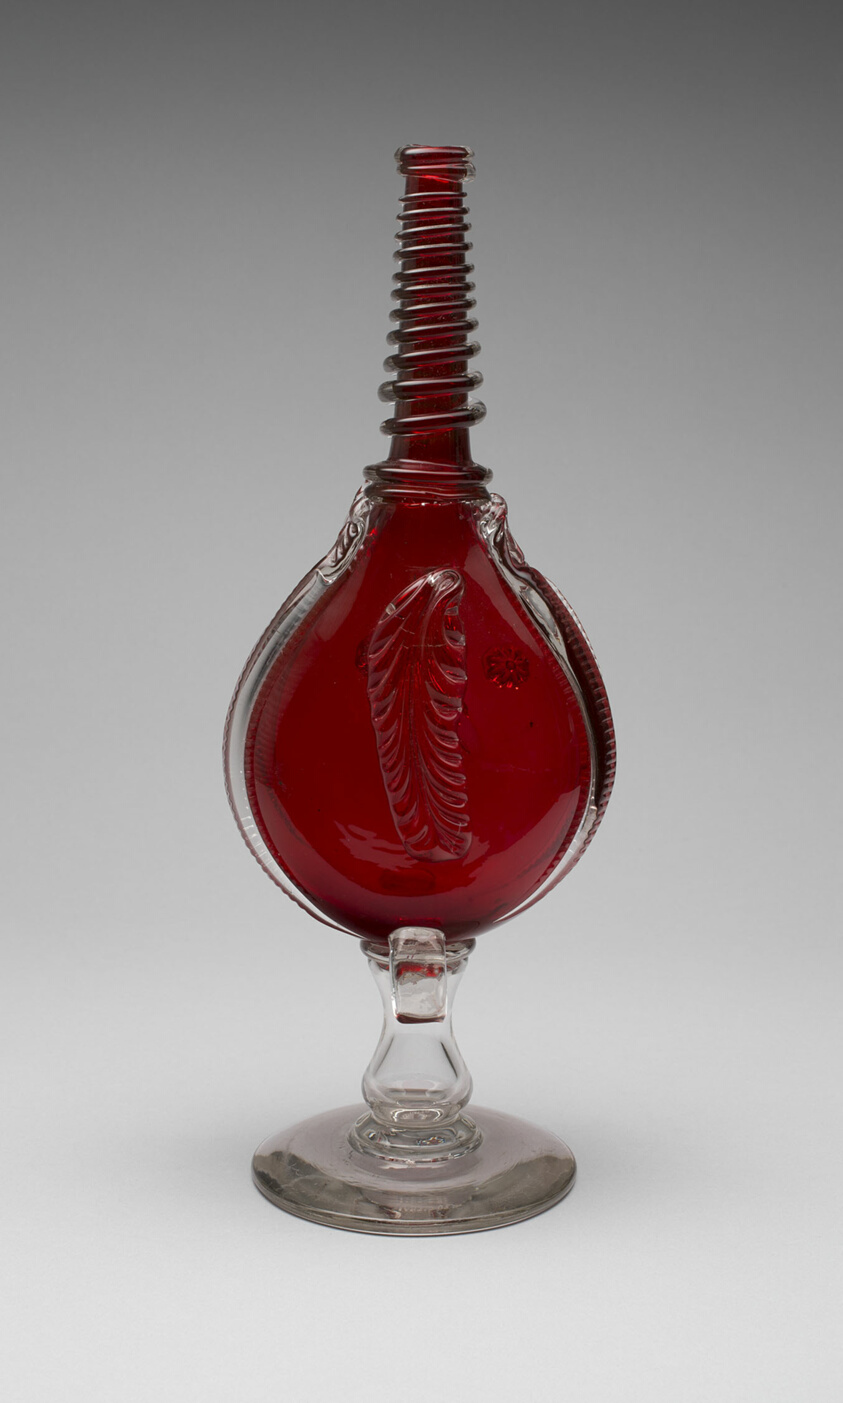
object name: Glass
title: Bottle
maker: Attributed to Boston and Sandwich Glass Company; American, 1825–1888; Sandwich, Massachusetts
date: 1840–60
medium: Glass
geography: Sandwich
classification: bottle; glass; american decorative arts; american arts; decorative arts